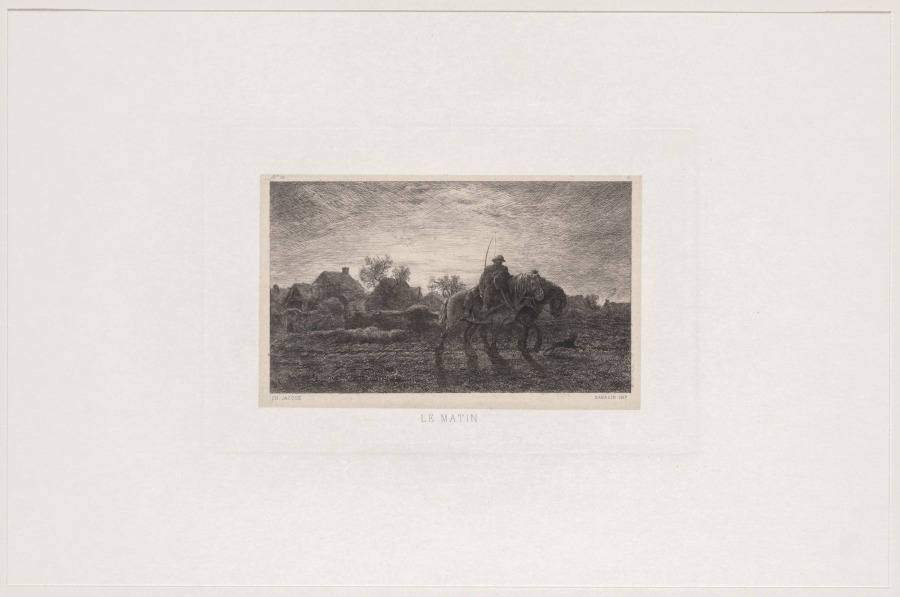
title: Morning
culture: France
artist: Charles-Émile Jacque (French, 1813–1894)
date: c. 1864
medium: etching, drypoint, and engraving on chine collé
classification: Print